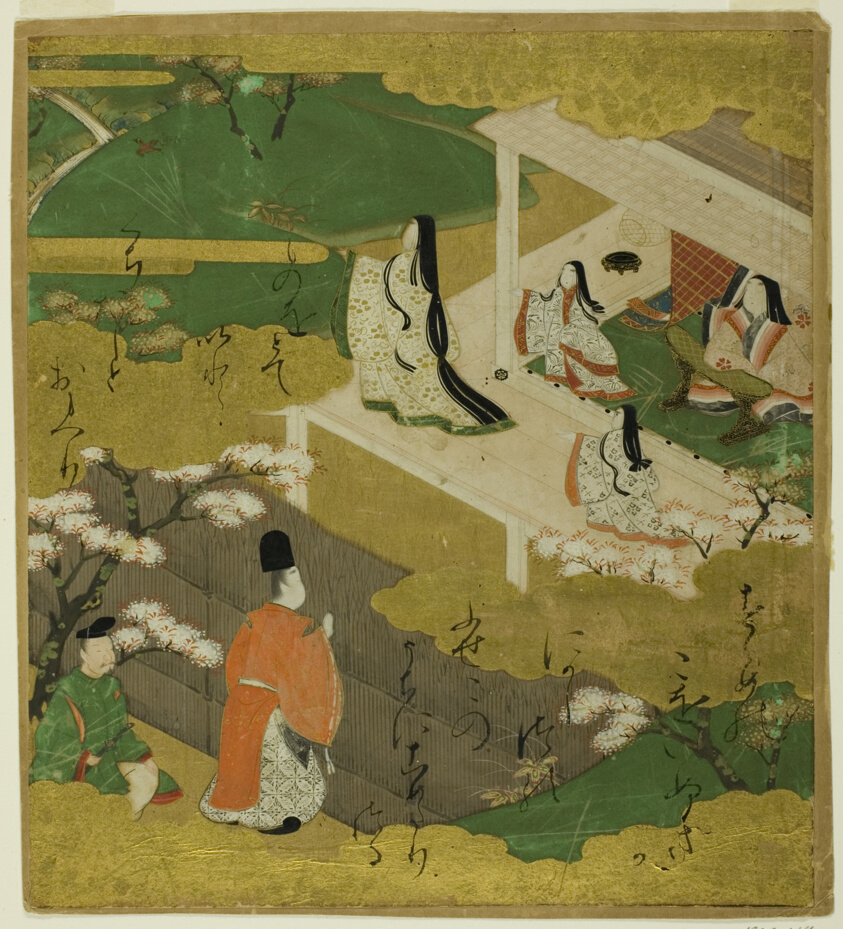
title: Illustration of the Tale of Genji, chapter 5 Waka-Murasaki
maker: Studio of Tosa Mitsuyoshi; Japanese, 1539-1613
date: 17th century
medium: Shikishi, ink, colors, and gold leaf on paper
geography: Japan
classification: pen and ink drawings; painting; asian art